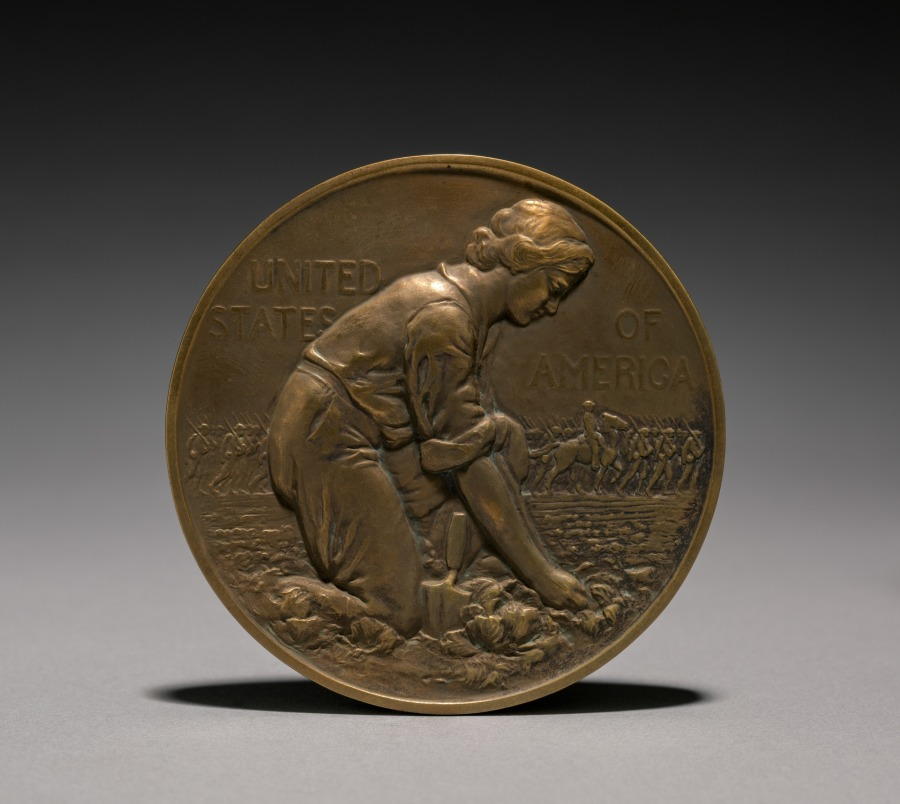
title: Medal: National War Garden Commission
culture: America, New York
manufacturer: Tiffany & Co. (America, New York, est. 1837)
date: c.1914–19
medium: bronze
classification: Metalwork